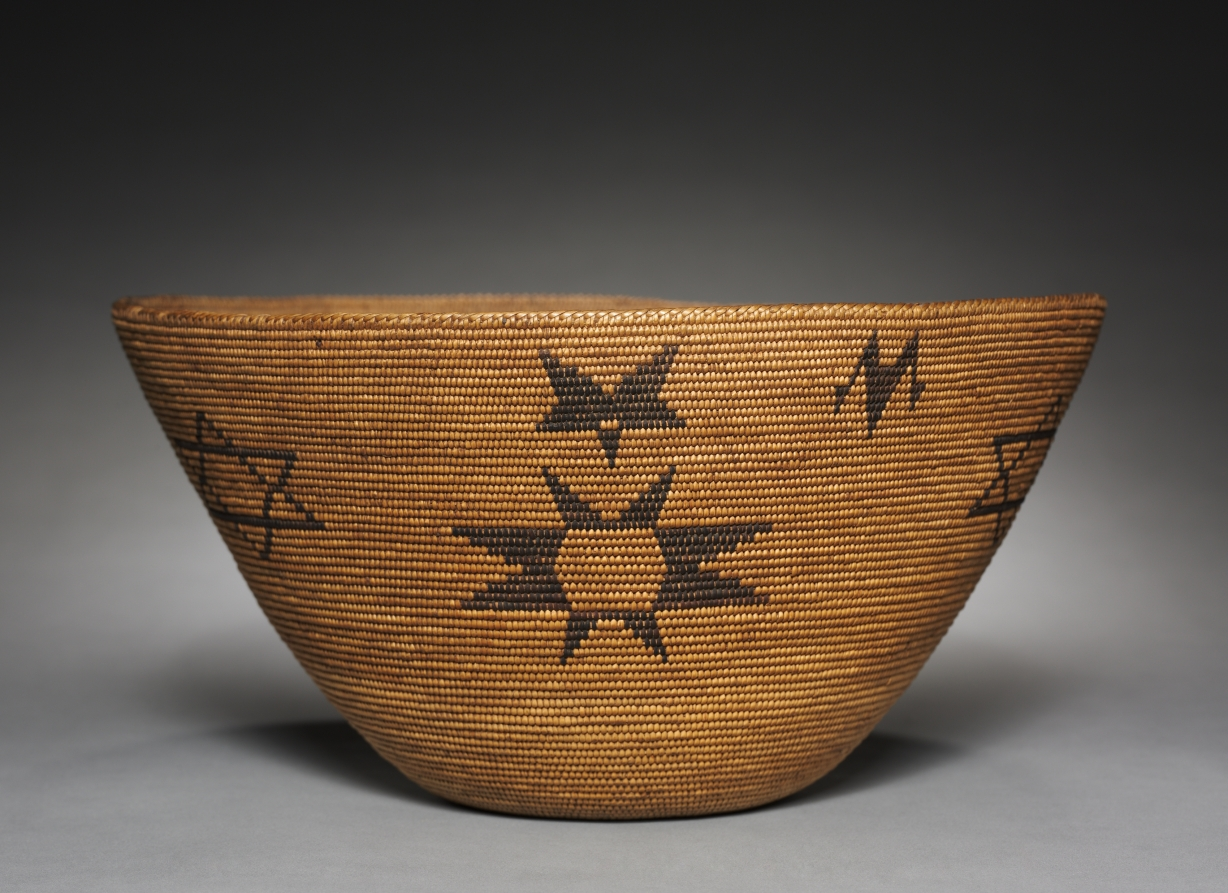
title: Cooking Bowl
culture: Great Basin, Washoe, late 19th- early 20th century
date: 1890s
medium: Willow, Bracken fern root; coiled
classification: Basketry